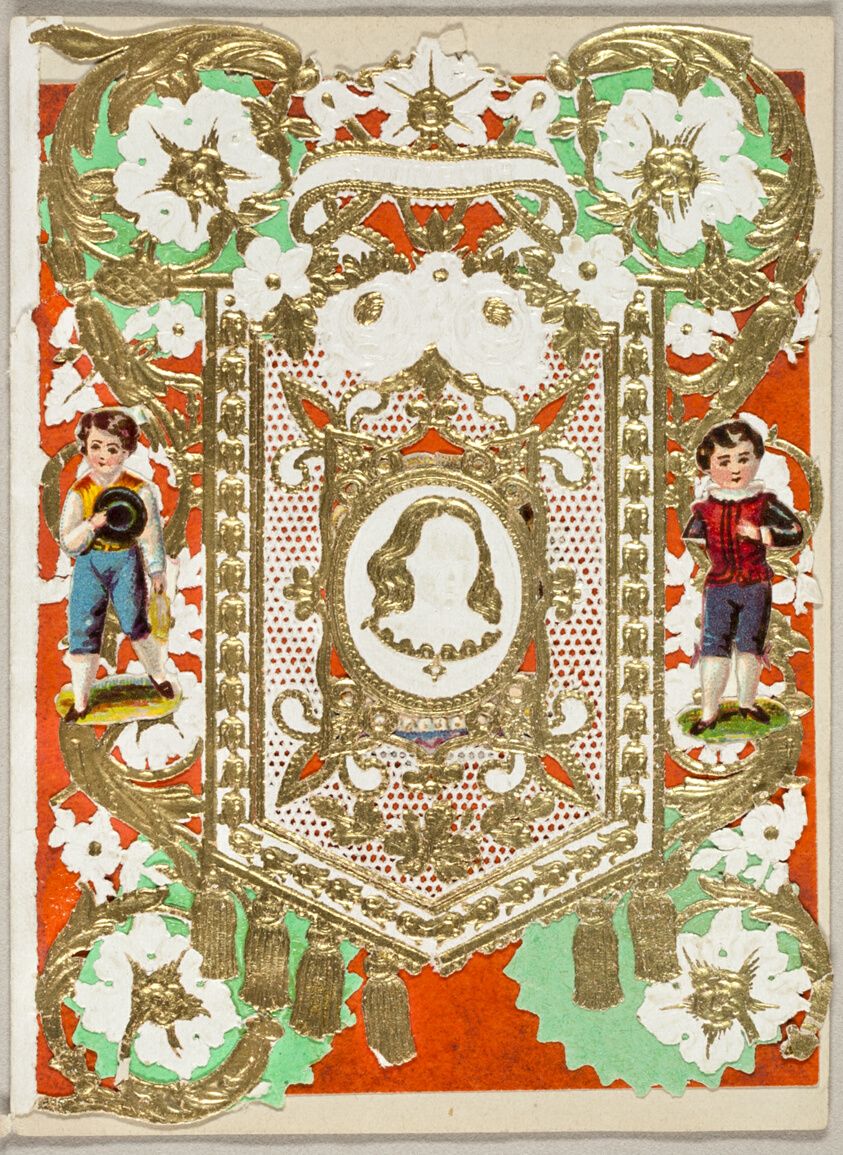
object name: Drawing and Watercolor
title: Souvenir (valentine)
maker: Unknown Artist; American or English, 19th century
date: 1860/69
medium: Gold paint and collaged elements on cut and embossed (designed) ivory wove paper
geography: United States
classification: collage; valentine; prints and drawing; paper